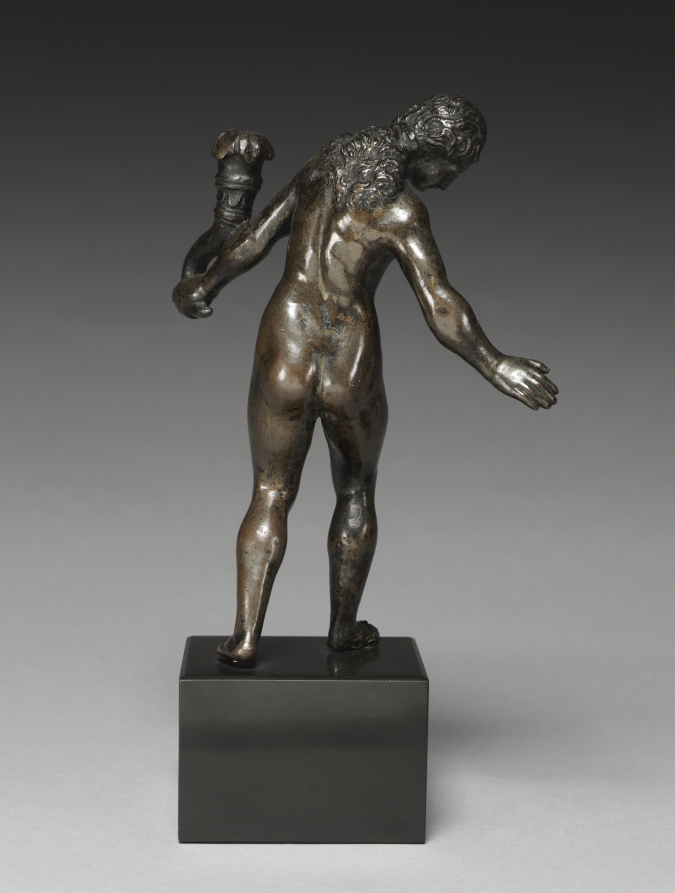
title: Woman with a Cornucopia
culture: Italy, 16th century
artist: Severo da Ravenna (Italian, c.1496–c.1543)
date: c. 1525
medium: bronze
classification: Sculpture